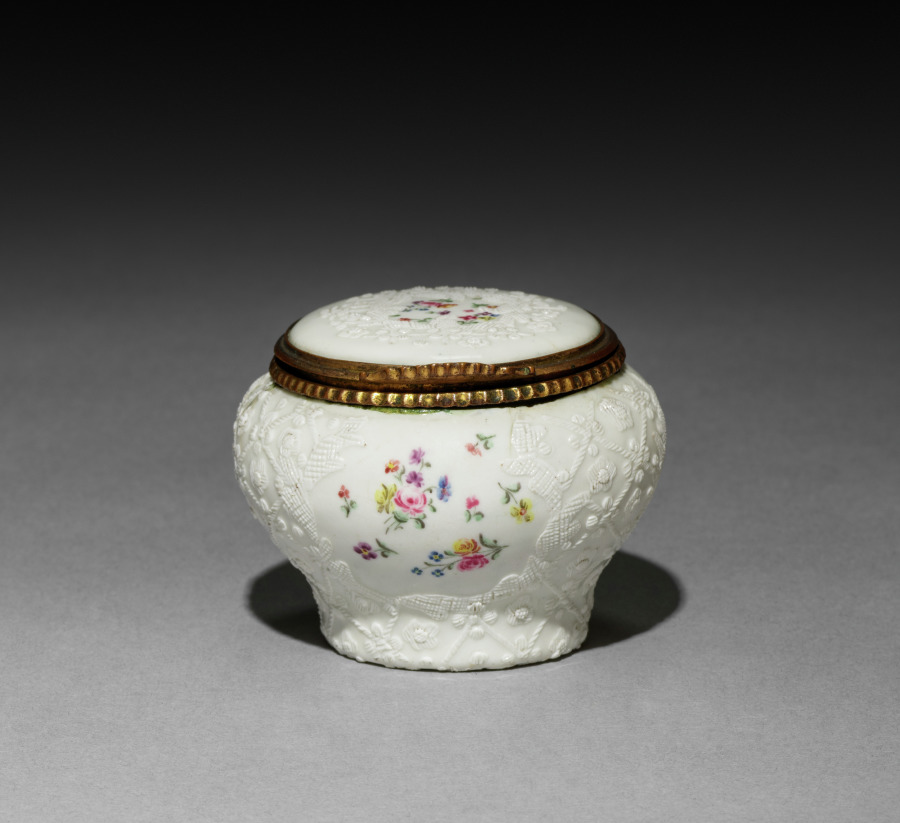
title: Box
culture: England, Staffordshire, 18th century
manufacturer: South Staffordshire Factory (British)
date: c. 1770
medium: enamel on copper with metal mounts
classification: Miscellaneous